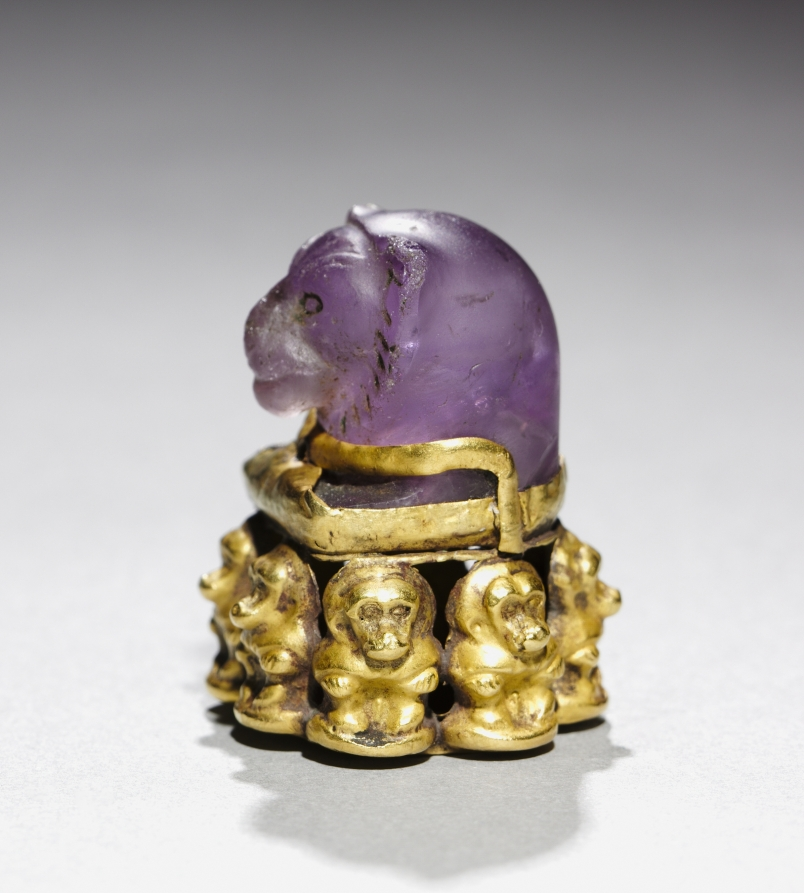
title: Pendant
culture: Sudan, Napatan; lion's head component: probably Egypt, Third Intermediate (1069–715 BCE), Dynasty 25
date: c. 700 BCE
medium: amethyst and gold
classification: Jewelry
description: This pendant consists of two parts: a superbly carved lion’s head in amethyst that has been set into a D-shaped gold base consisting of a platform surrounded by eight seated baboons. The lion’s head is an heirloom from the New Kingdom, most likely a gaming piece that had been adapted in the Napatan period to serve as an pendant amulet. This procedure was fairly common in antiquity as a means of recycling precious stones. The importance of leonine deities in Nubian religion was obviously the motivating force behind the creation of this spectacular ornament.